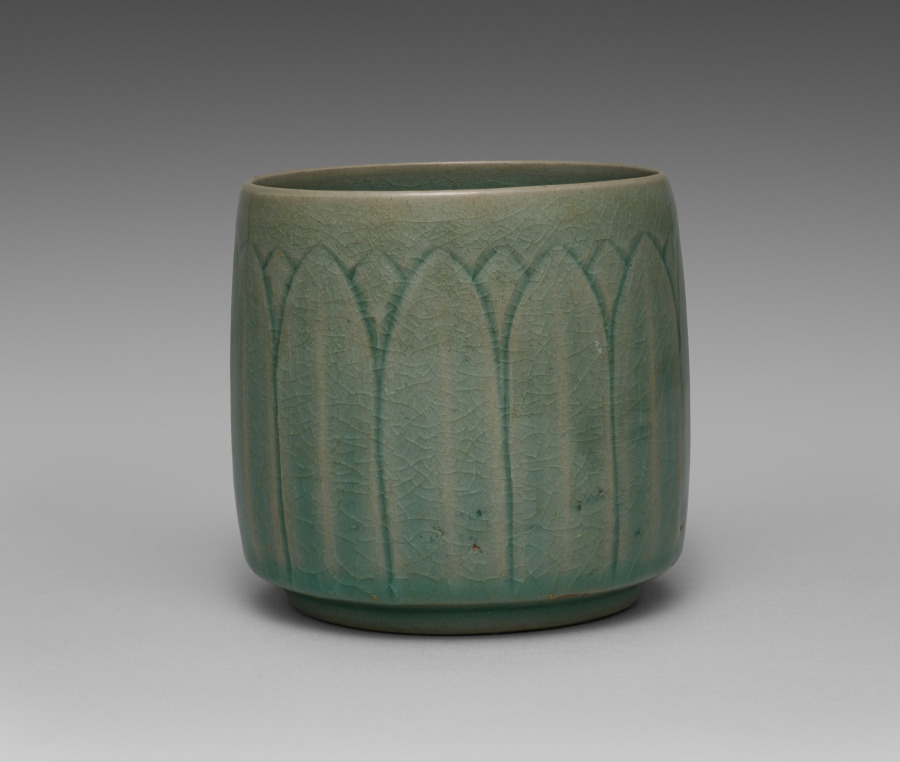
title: Celadon Cup with Molded Lotus Petal Design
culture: Korea, Goryeo dynasty (918–1392)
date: 1100s–1200s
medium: Celadon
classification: Ceramic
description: Celadon wares intended for everyday use—such as this dish—were among the most common burial objects placed in tombs during the Goryeo period (918–1392). Furnishing tombs with elaborate assemblages of objects was believed to honor the deceased and provide comfort in the afterlife. This dish, featuring the lotus petal motif, was likely a cherished possession that accompanied its owner to their final resting place.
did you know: The outer wall of this teacup is decorated with the image of lotus flower petal, a symbol of purity and salvation.